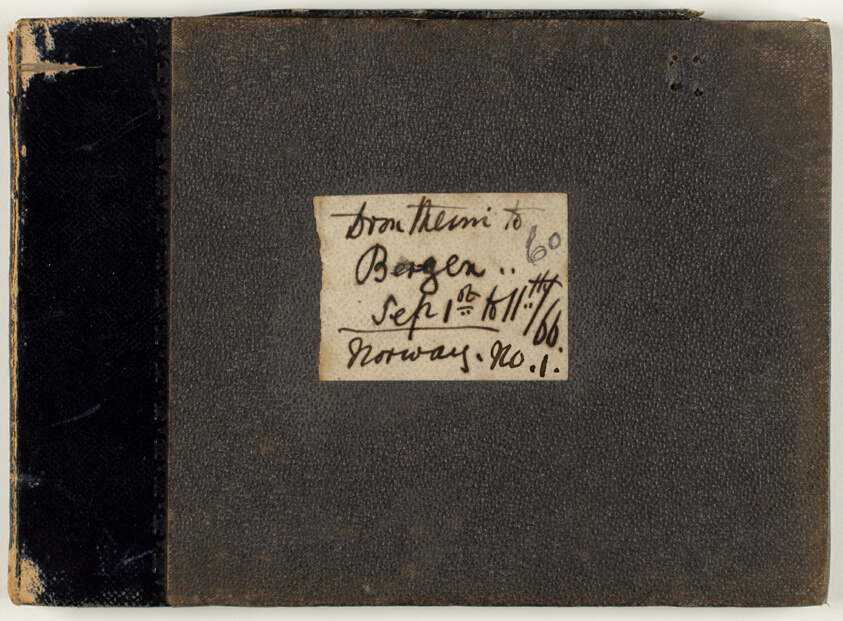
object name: Book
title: Norway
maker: Charles George Lewis (English, 1808-1880)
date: 1866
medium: Sketchbook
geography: England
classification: sketchbook; drawings (visual works); prints and drawing; book